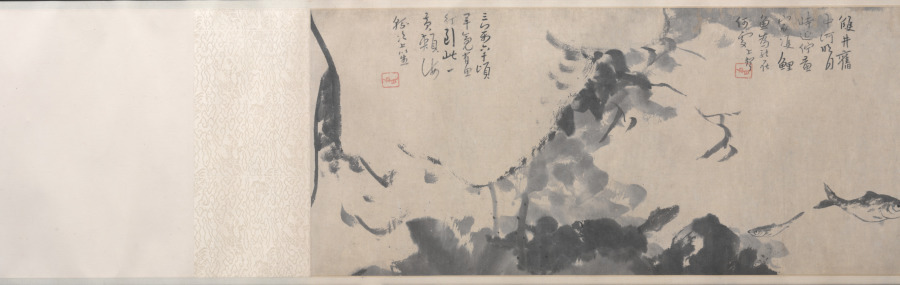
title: Fish and Rocks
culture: China, Qing dynasty (1644-1911)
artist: Bada Shanren (Chinese, 1626–1705)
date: mid- to late 1600s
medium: Handscroll; ink on paper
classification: Painting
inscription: 去天纔尺五，只見白雲行。 云何畫黃花，雲中是金城。 [印] 个山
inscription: 雙井舊中河，明月時延佇。 黃家雙鯉魚，為龍在何處。 [印] 个山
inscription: 三萬六千頃，畢竟有魚行。 到此一黃頰，海潮次上笙。 [印] 个山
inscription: 5 additional seals: 2 of Zhang Daqian 張大千 (1899–1983); 1 of Ta-an Chü-shih; 2 unidentified.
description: Bada Shanren, also called Zhu Da, a 17th-century painter who rejected conventions in favor of an individual, personal expression, is known for his unorthodox compositions of fish, flowers, birds, and rocks. Fish in his paintings are often looking upward toward heaven, swimming in a pond of undefined space. As a member of the Ming imperial family, Zhu Da lost his princely status and hid in a monastery when the Manchus, foreigners from the north, established the Qing dynasty in 1644. This scroll may have some autobiographical meaning, representing fish as leftover subjects (yimin) who lived in a void, having lost their roles in life after the fall of the dynasty.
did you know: After each poem, Bada Shanren used his so-called jixingyin seal 屐形印, which resembles the impression of a shoe on soft mud.